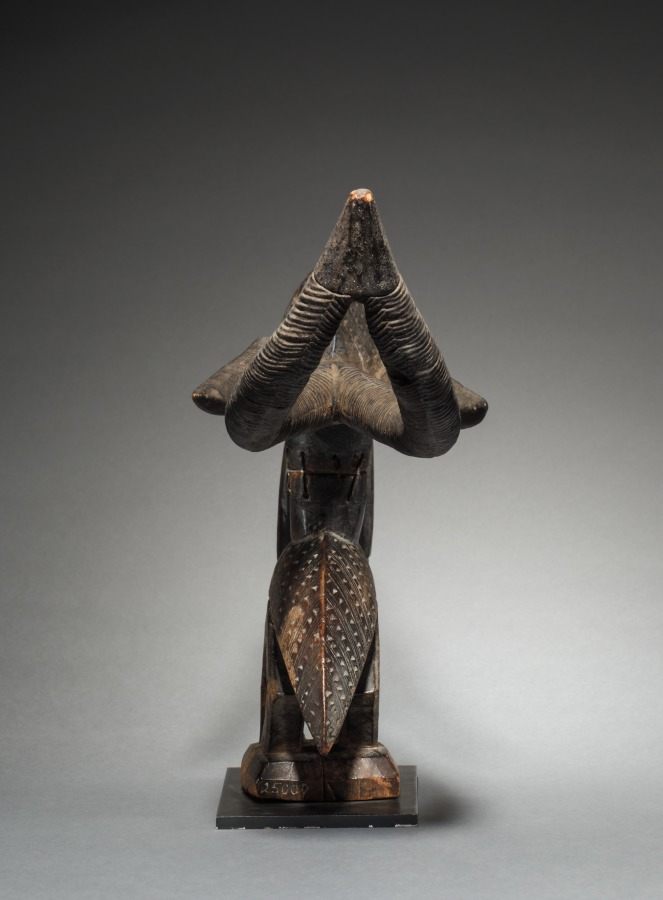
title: Double-Headed Headdress (N'gonzon Koun)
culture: Africa, West Africa, Mali, Bamana-style blacksmith-carver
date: 1900s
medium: Wood and iron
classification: Mask